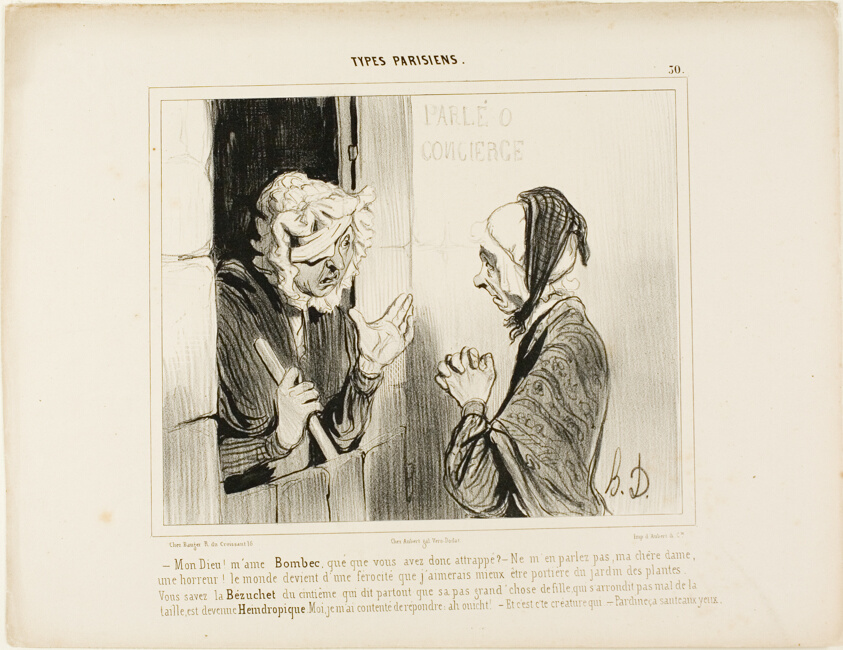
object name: Print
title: "- My God! Madame Bombec, what happened to you? - Don't mention it, my dear, it's horrible. The world is going from bad to worse, I would rather be janitor at the botanical garden! You know that Bézuchet from the fifth floor, the one that always insists that her good-for-nothing daughter who is fat around the hips has become..... I only replied: Ah, well! - And that's the person who… - Of course, even a blind man can see that!,” plate 30 from Types Parisiens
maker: Honoré Victorin Daumier; French, 1808-1879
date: 1840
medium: Lithograph in black on white wove paper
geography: France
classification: lithograph; print; prints and drawing